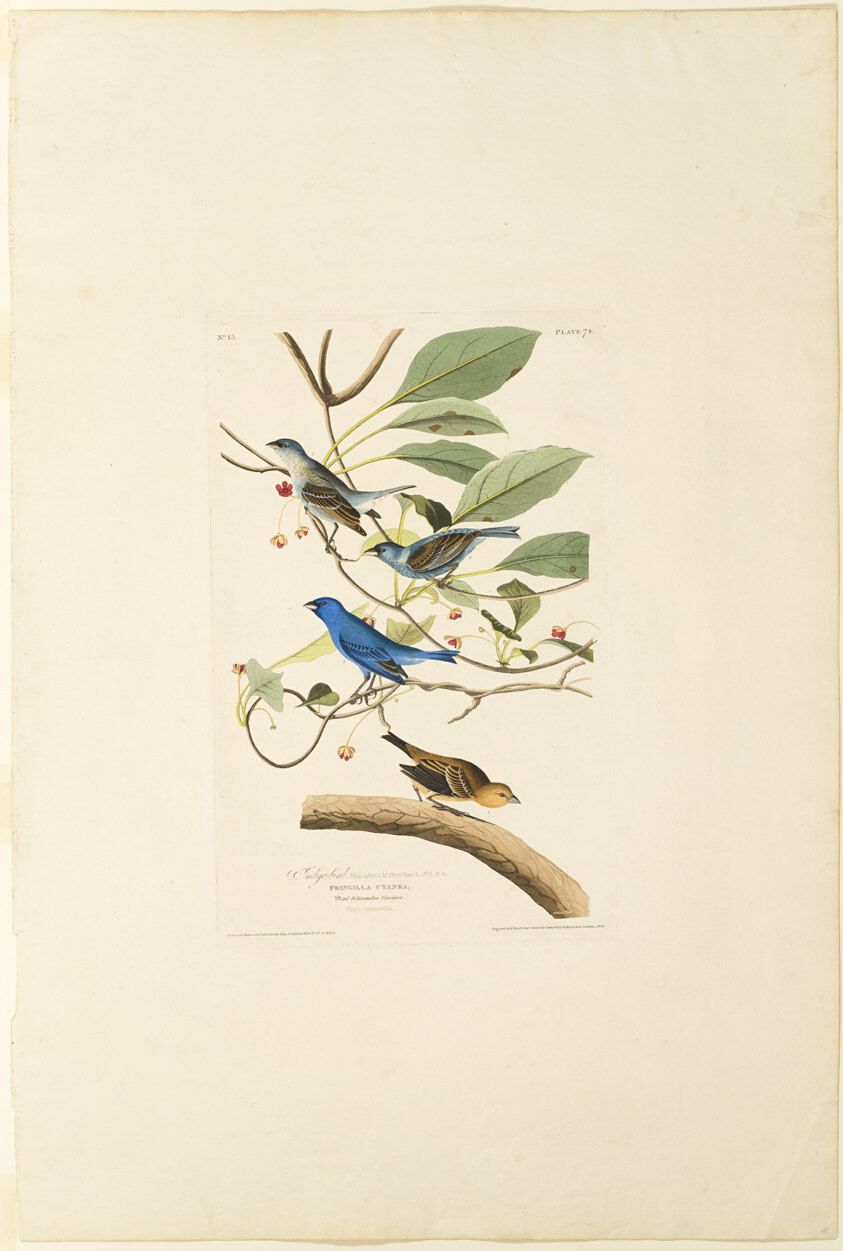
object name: Print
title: Male Indigo Bird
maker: Robert Havell (English, 1793-1878); after John James Laforest Audobon (American, 1775-1851)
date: 1829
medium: Hand-colored engraving, with aquatint, on cream wove paper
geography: England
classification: etching; print; prints and drawing